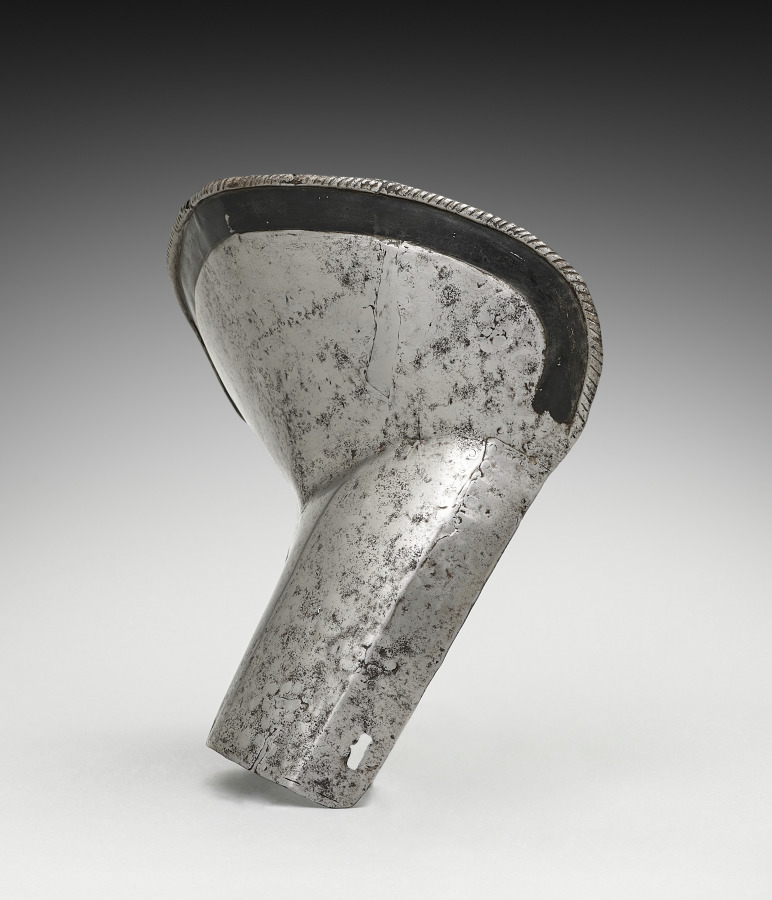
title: Gardbrace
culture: Germany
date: c.1550–1570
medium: iron, steel, leather and brass rivets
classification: Arms and Armor